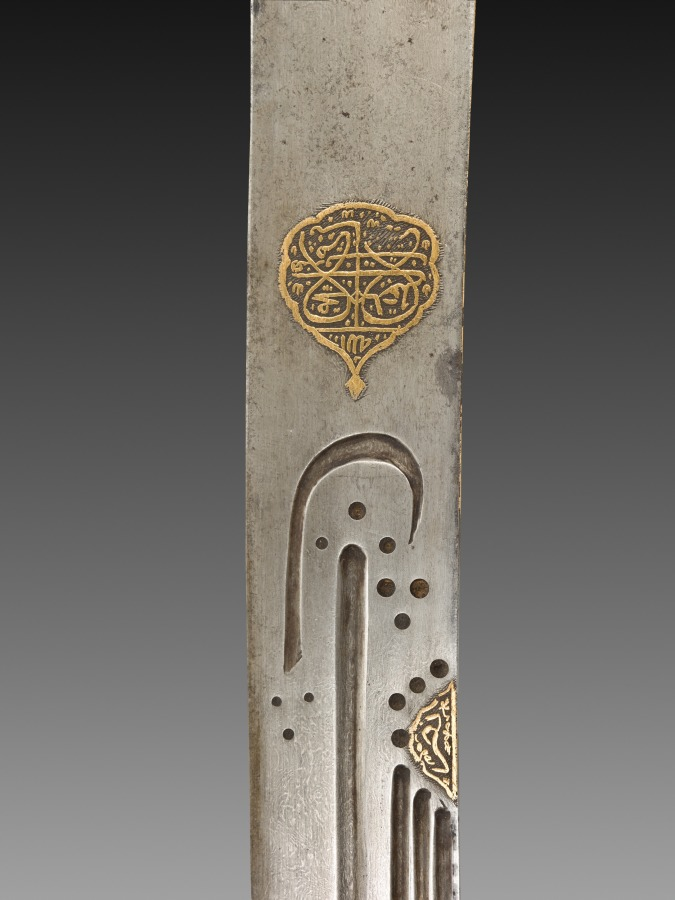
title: Silapa Sword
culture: India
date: 1700s–1800s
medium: gold with inlay and leather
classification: Arms and Armor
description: The exceptionally thin, curved blade is made of watered steel. The grooves, called fullers, allowed for weight reduction and prevented flexion. The costly hilt is fully overlaid with brass in steel, both inside and outside the knuckle.